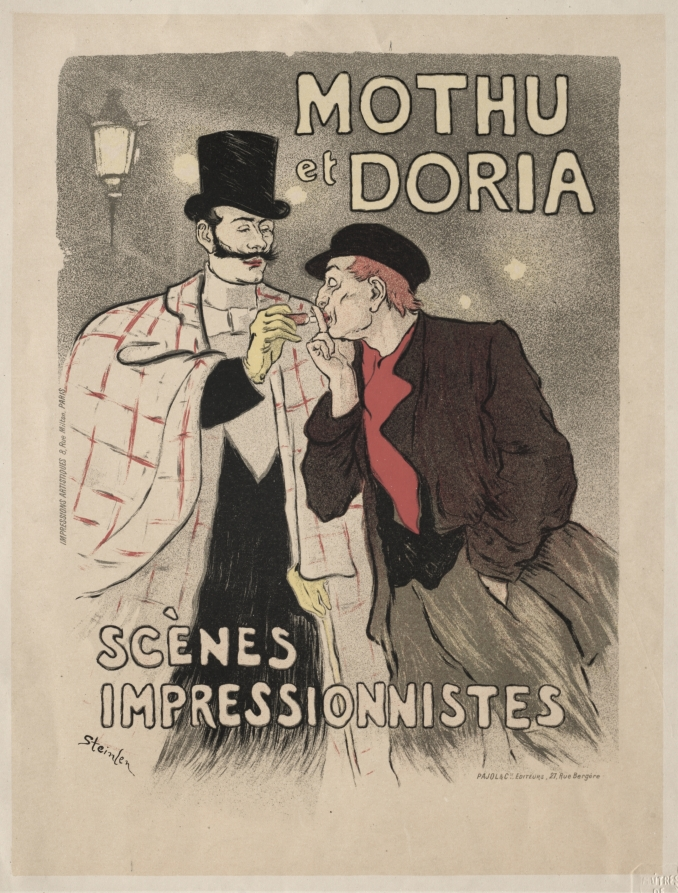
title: Mothu et Doria - Scènes impressionistes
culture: Switzerland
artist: Théophile Alexandre Steinlen (Swiss, 1859–1923)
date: 1893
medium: lithograph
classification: Print